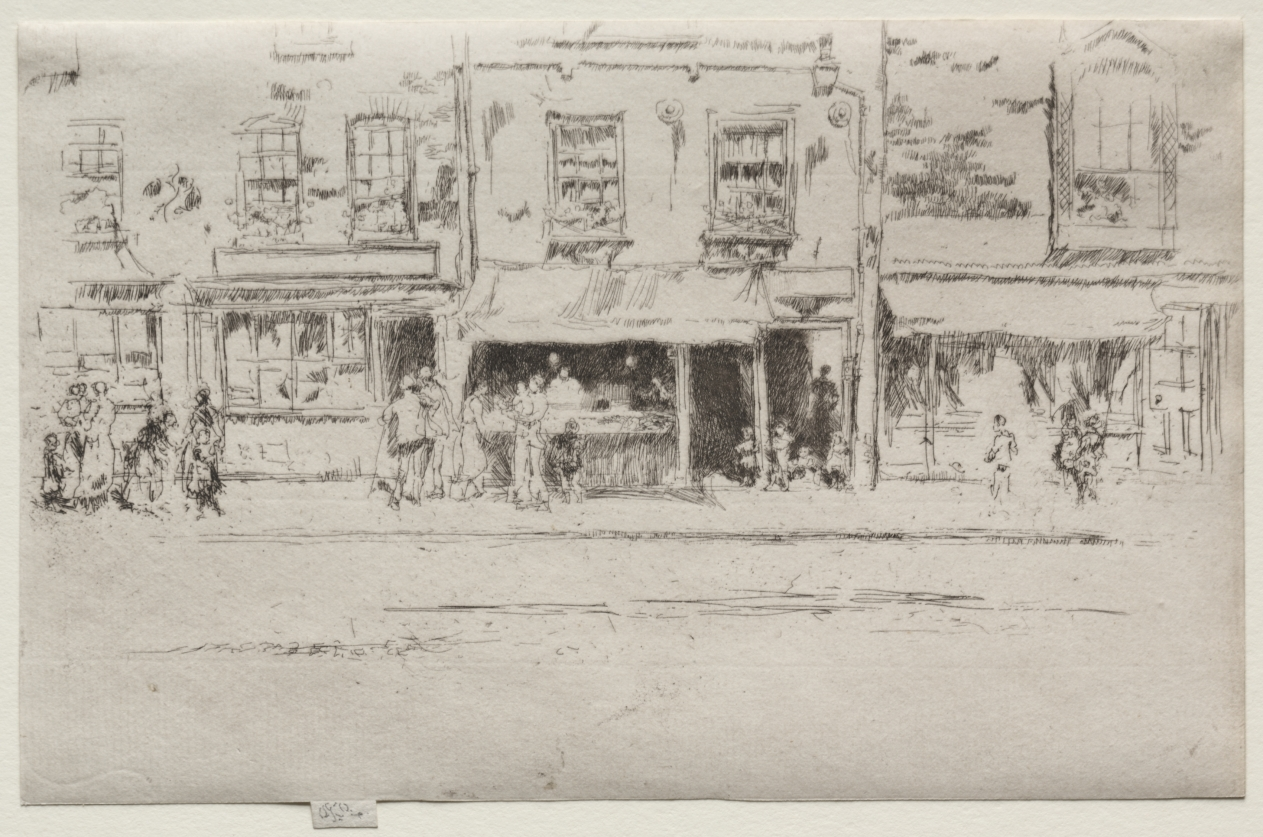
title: Fish Shop, Chelsea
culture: America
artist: James McNeill Whistler (American, 1834–1903)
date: 1886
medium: etching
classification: Print